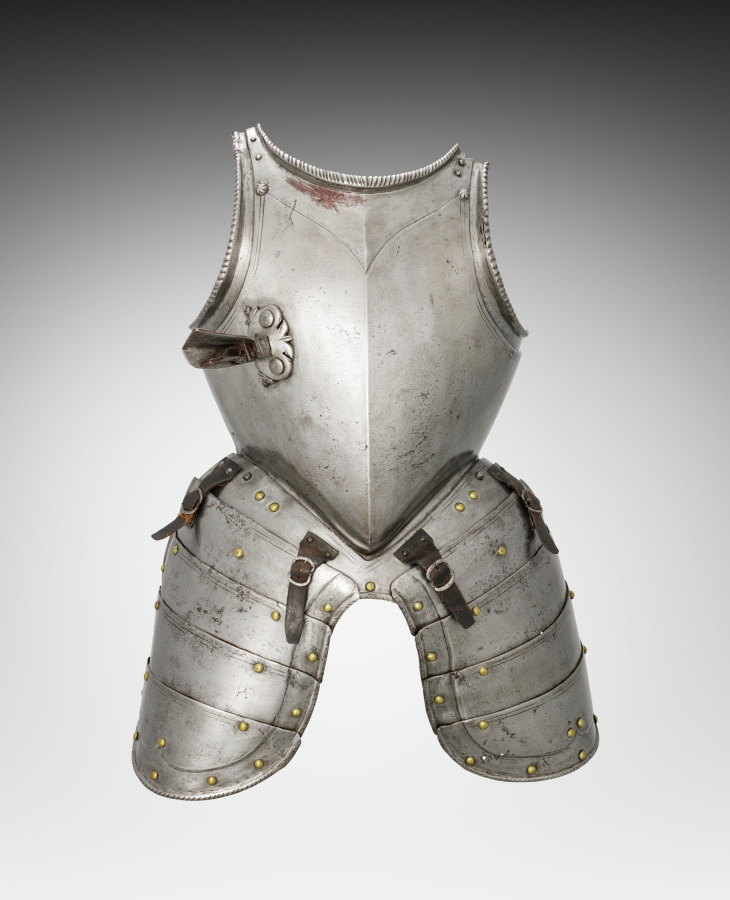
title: Breastplate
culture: South Germany, 16th century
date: c. 1560–1580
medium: steel, leather straps, brass rivets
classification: Arms and Armor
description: This armor was developed for the joust-a sporting combat between two mounted contestants. Although all of the elements of this armor date from the same period, they are not all from the same suit. This armor is thus called "composed." It also shows the asymmetry of jousting armor. The participants rode along a wall-like barrier known as a "tilt" with their left sides facing one another. Consequently, armor on that side of the body had to be thicker. Note the large plate (grandguard) over the left shoulder for extra protection. Also, the breathing holes in the helmet were placed on the right side (farthest from an opponent's lance) to avoid injuries from splinters. The bracket attached to the right breastplate is called the lance-rest, a shock-absorbing support designed to accommodate the lance when "couched" under the right armpit.